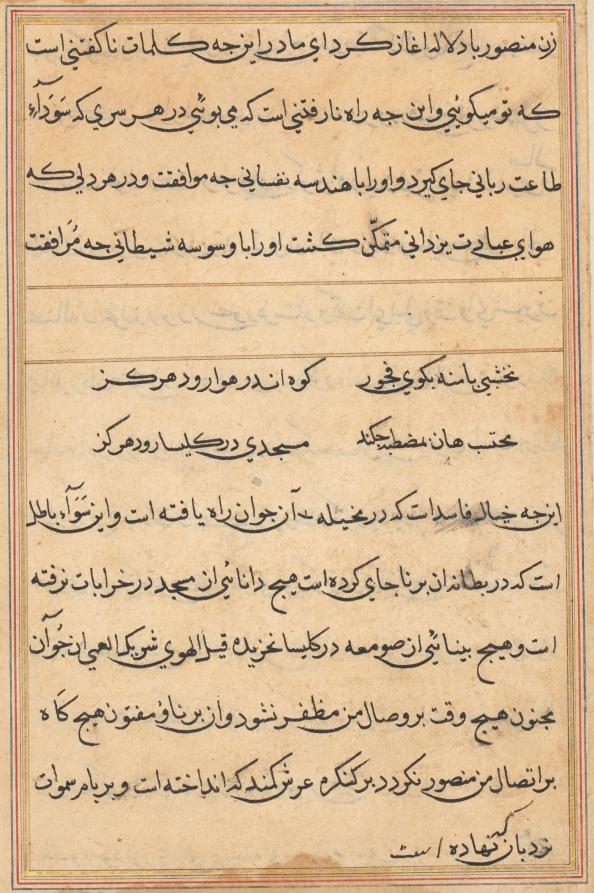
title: Page from Tales of a Parrot (Tuti-nama): text page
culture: Mughal India, court of Akbar (reigned 1556–1605)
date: c. 1560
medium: gum tempera, ink, and gold on paper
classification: Painting